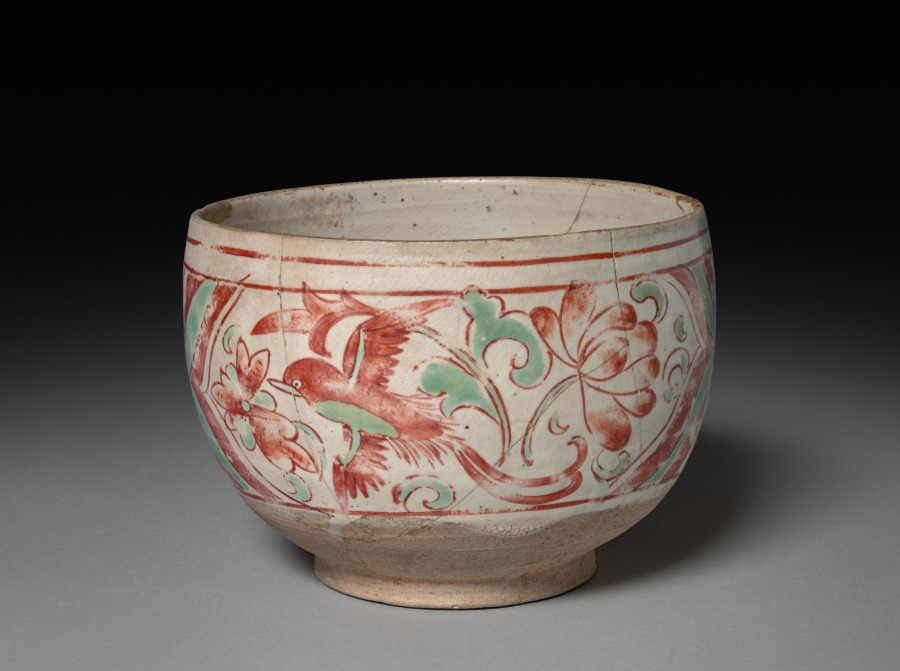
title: Bowl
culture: China, Jin dynasty (1115-1234) - Yuan dynasty (1271-1368)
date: 1200s–1300s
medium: buff stoneware with underglaze slip application and overglaze enamel decoration; Cizhou ware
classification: Ceramic